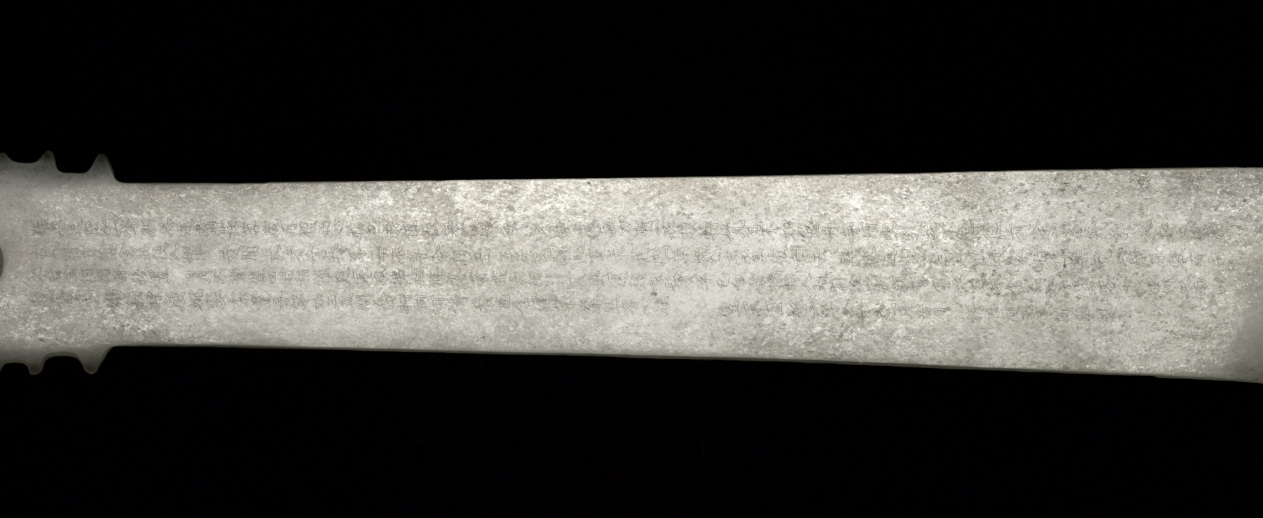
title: Scepter (Gui) with Miscellaneous Poems by Tao Qian (365–427 CE)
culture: China, Possibly Qing dynasty (1644-1911), Qianlong period (1736-1795)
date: 1122 or later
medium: translucent white jade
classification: Jade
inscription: "Respectfully made by the jade works of the palace work bureau, on an auspicious day in the twelfth month of the winter, in the third year of Xuanhe of the Imperial Song (Dynasty)" (1121). On the front and back of the knife are engraved, in minute characters with double contour lines, eight complete poems entitled "Miscellaneous Thoughts" by Tao Yuanming (365–427 CE), one of the greatest early poets of China. Here are two examples: The bright sun sinks beyond the western ridge,/ The white moon rises behind the eastern range./ Afar, afar a myriad miles it flashes,/ Immeasurably vast its light amidst the sky./ A wind comes and enters the bedroom door,/ So in the night pillow-and mat are cold./ The air seems different- - I awake to the season's change./ I cannot go to sleep and know the night's eternity,/ I wish to speak but there is no friend to talk to./ Raising my cup I challenge my lonely shadow./ The days and months fling us aside and pass;/ We have high purposes but cannot realize them./ Thinking of this I have grief and pain at heart,/ And all night long can find no quietness./ It is hard to dwell long in prosperity;/ Rise and decline cannot be reckoned on./ What were formerly lotus buds in May,/ Now in the autumn are but withered seed-pods./ A heavy frost stiffens the prairie grasses- - / They wilt despondently and do not quickly die.-/ The sun and moon come ever circling back./ Once we depart we do not shine again./ I ponder deeply on times long past and gone/ Though to remember them tears my very entrails.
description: This piece derives its shape from the ancient jade scepter known as gui. On both sides of the jade surfaces are the inscribed texts "Miscellaneous Five-Character Poems by the Jin Poet Tao Qian" engraved in minuscule characters, with a reference indicating that the piece was made by the jade workshop of the Xiuneisi Office in 1122 of the Xuanhe reign. This Northern Song attribution is, nevertheless, questionable.